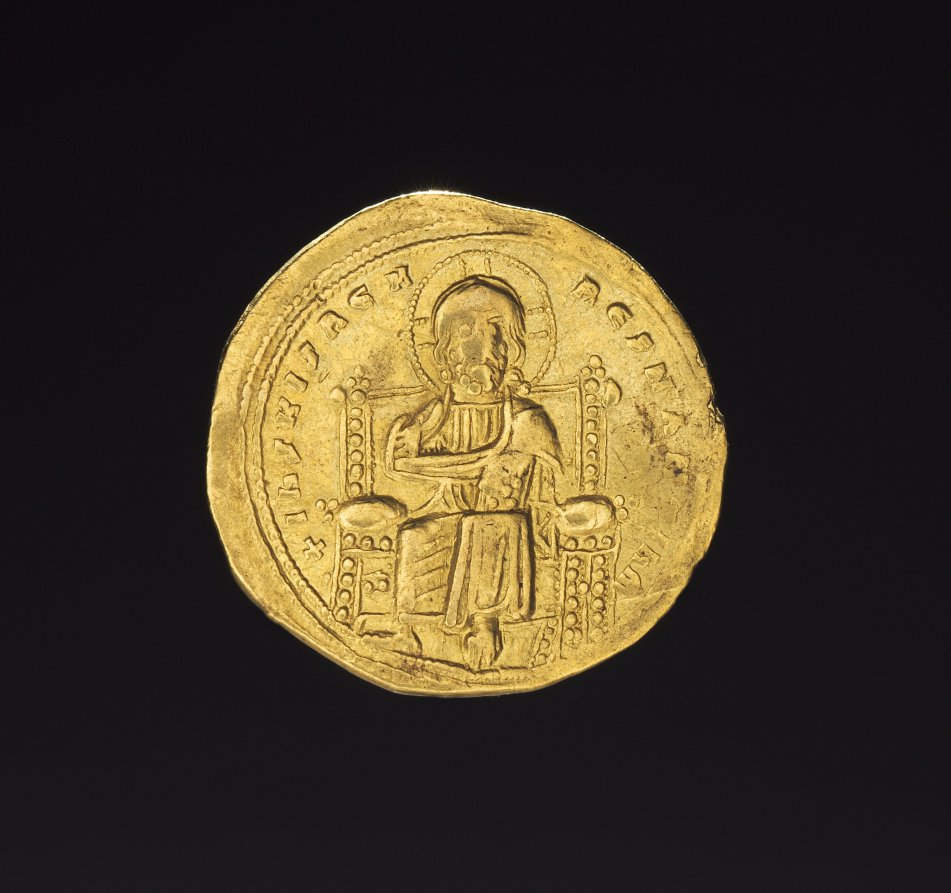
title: Histamenon of Romanus III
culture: Byzantium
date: 1028–1034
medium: gold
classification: Coins